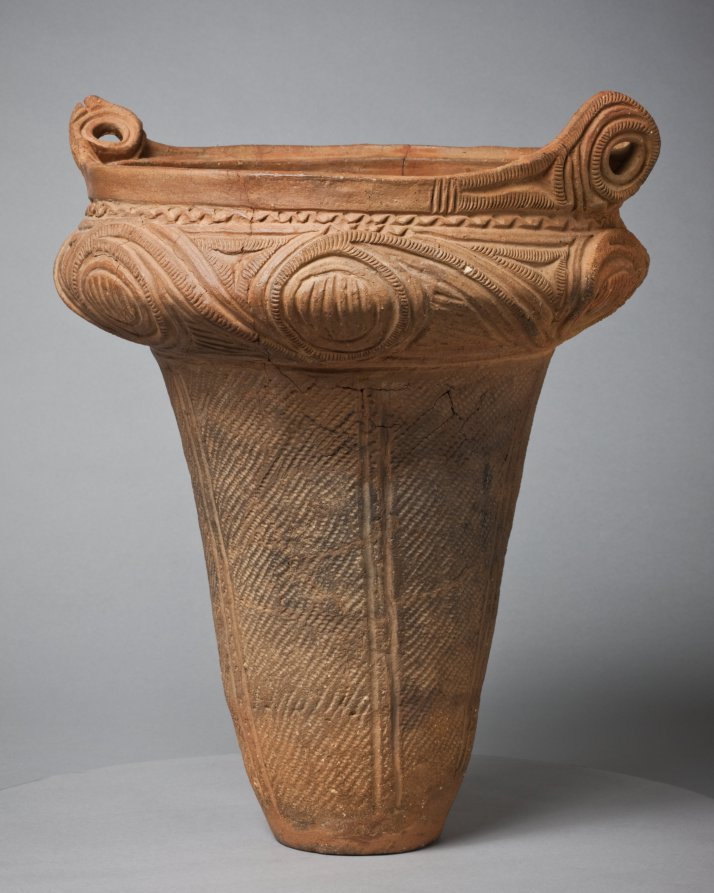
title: Urn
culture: Japan, Jōmon period (c. 10,500–300 BCE)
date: c. 2000 BCE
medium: earthenware, terracotta, impressed and incised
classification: Ceramic